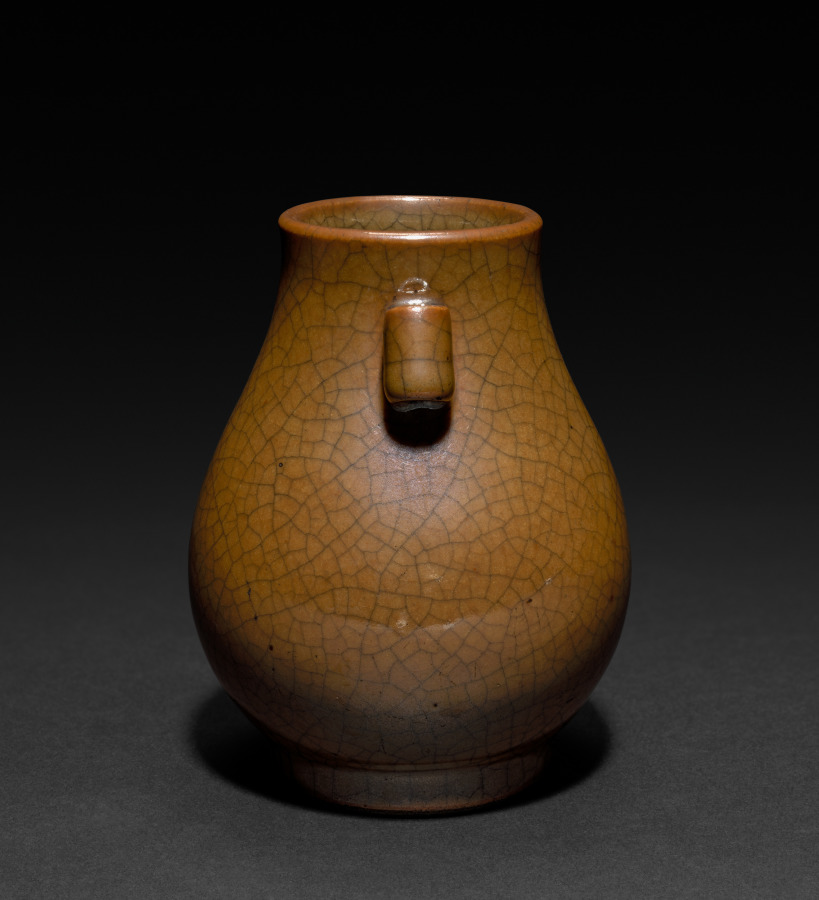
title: Pear-shaped Jar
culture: China, Qing dynasty (1644-1911), Kangxi reign (1661-1722)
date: 1661–1722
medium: porcelain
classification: Ceramic